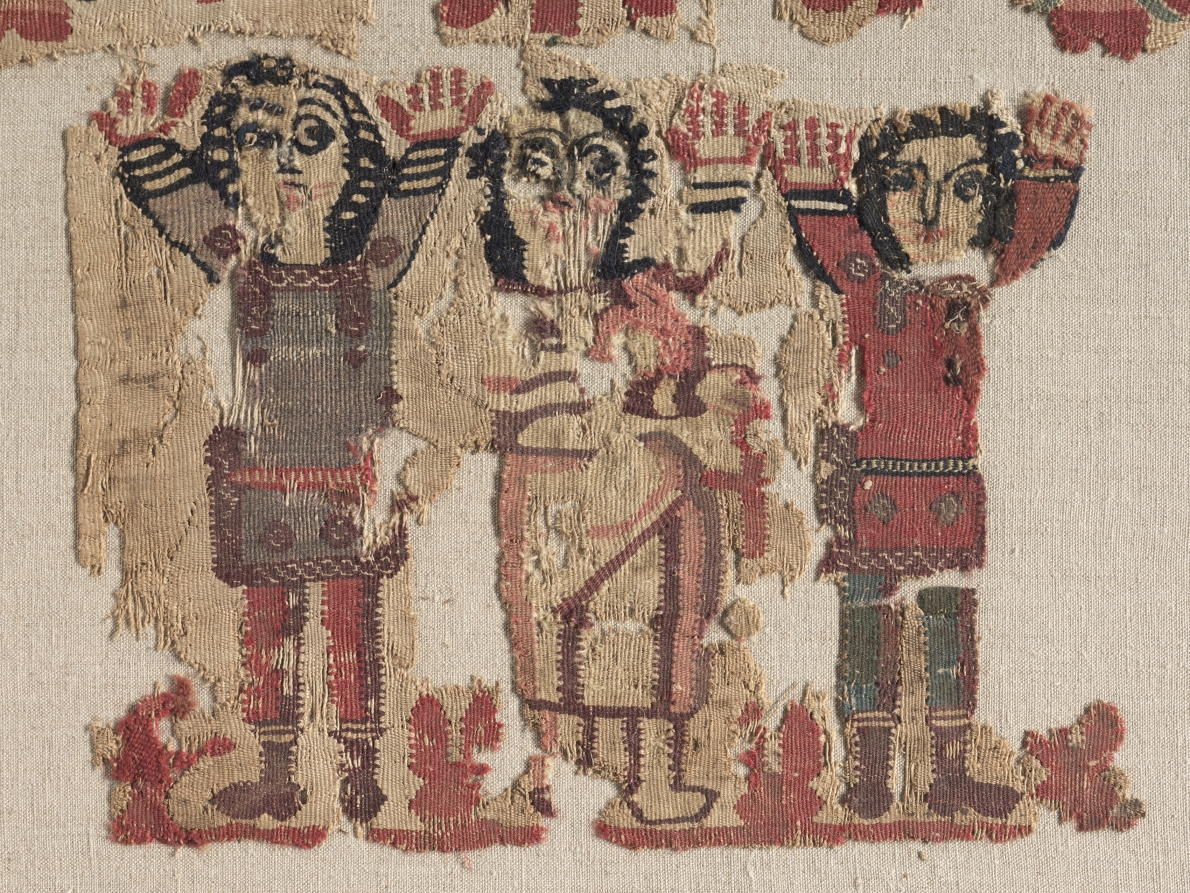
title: Hanging with Christian Images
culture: Egypt, Byzantine period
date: 500s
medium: dyed wool, undyed linen: plain weave (tabby) with inwoven tapestry weave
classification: Textile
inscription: inscribed below the ankh cross: IXOYC.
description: This rare surviving hanging with Christian symbols likely served as a wall decoration in a church or a home. The three men who stand beneath an arch may represent the three Hebrews who refused to worship a golden idol, and when cast into the fiery furnace, remained unharmed due to God’s deliverance (Daniel 3:19–30). Above them is a Christogram formed by the first two letters of Christ’s name in Greek, X (chi) and P (rho), flanked by the letters for alpha and omega. Beneath the arch, an ankh, an ancient Egyptian symbol of life, is framed by two birds. Another Christogram appears above the arch between two peacocks. The significance of the combined use of these images and symbols lies in their invocation of Christ’s redemptive and life-giving power.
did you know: The two peacocks in the upper half of this composition represent immortality. Ancient Greeks and Romans believed that the body of the peacock did not decay after death and when this imagery was adopted by Christianity, the bird came to be associated with resurrection.